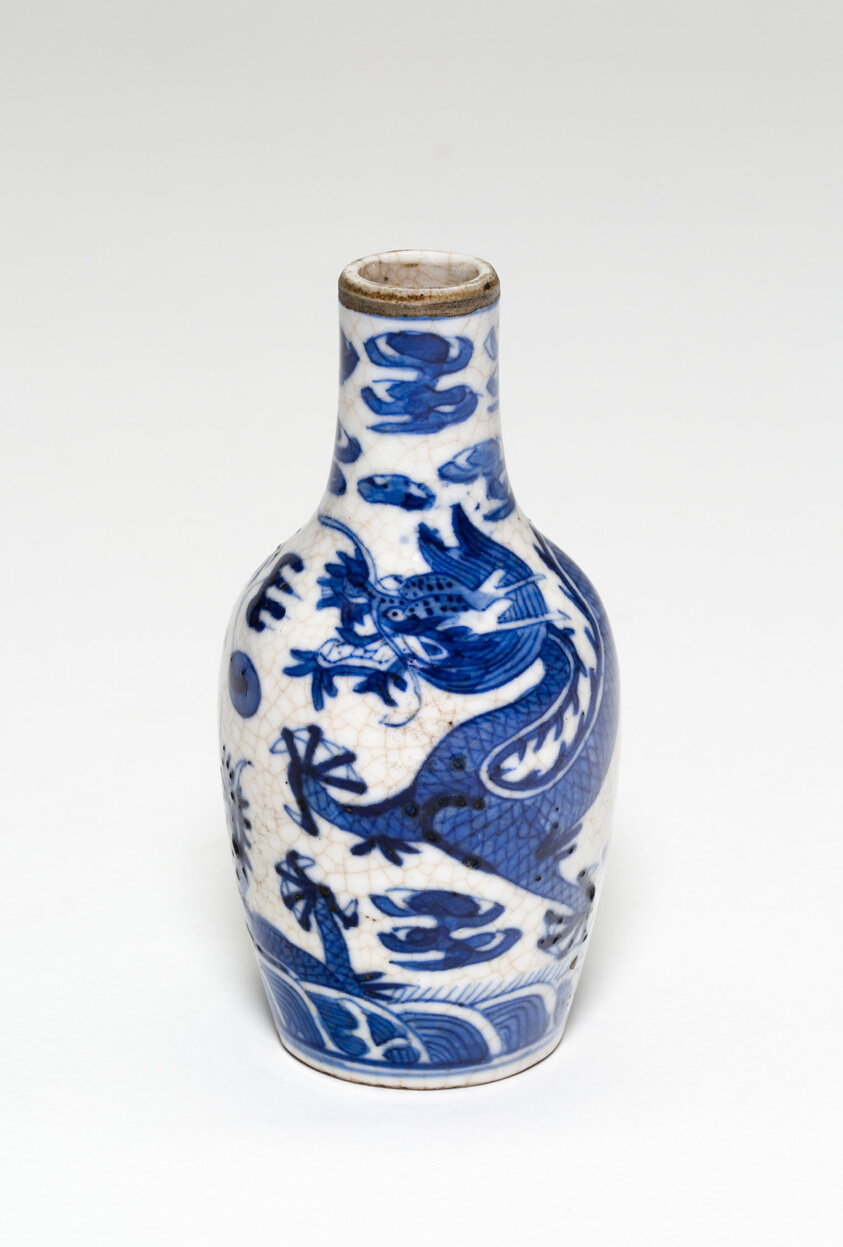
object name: Vessel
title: Miniature Vase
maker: China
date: Qing dynasty (1644–1911), c. 19th century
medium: Stoneware painted in underglaze blue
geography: China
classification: stoneware; asian art; ceramics